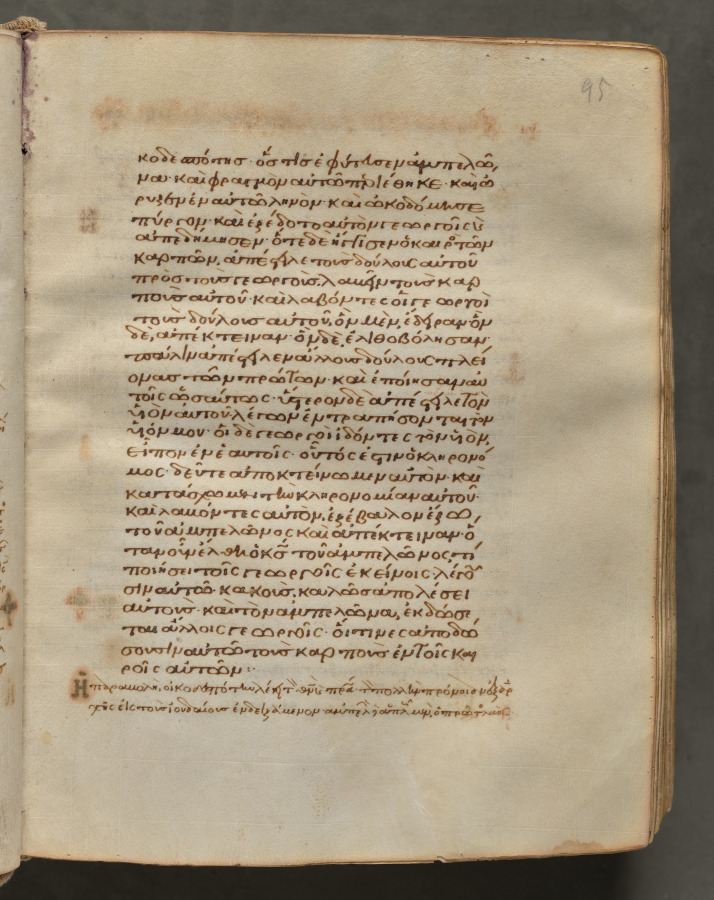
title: Text, folio 95 (recto), from a Gospel Book with Commentaries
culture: Byzantium, Constantinople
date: c. 1000–1100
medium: ink, tempera, and gold on vellum; leather binding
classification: Bound Volume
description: Each of the four gospels in this book opens on a page with brilliantly illuminated borders depicting the author of the text as well as birds-principally peacocks, symbols of the immortality of the soul-and fountains, representing the fountain of life and the salvation of the soul. This volume consists of 428 leaves with texts in Greek. Its level of sophistication suggests that it was probably written and decorated in a monastery in Constantinople.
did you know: Gospel Books were carried in procession through Byzantine churches.